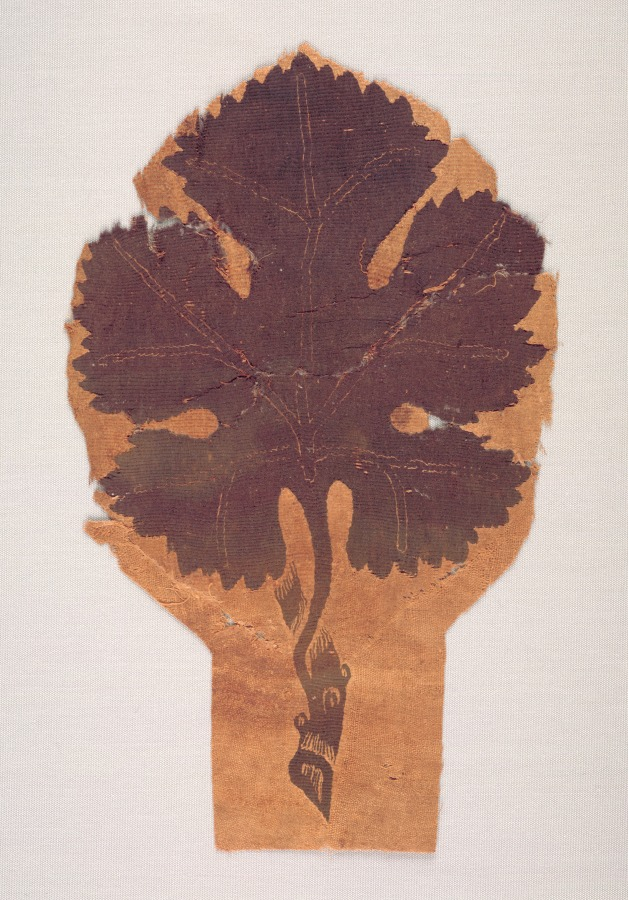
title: Grape Leaves from a Curtain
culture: Egypt, Byzantine period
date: 400s-500s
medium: weft-faced plain weave with tapestry weave and supplementary weft wrapping; undyed linen and dyed wool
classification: Textile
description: This deep-purple grape leaf once decorated the plain linen ground of a curtain. It probably refers to Dionysus, the classical god of wine, whose cult was popular in Egypt through the 6th century.